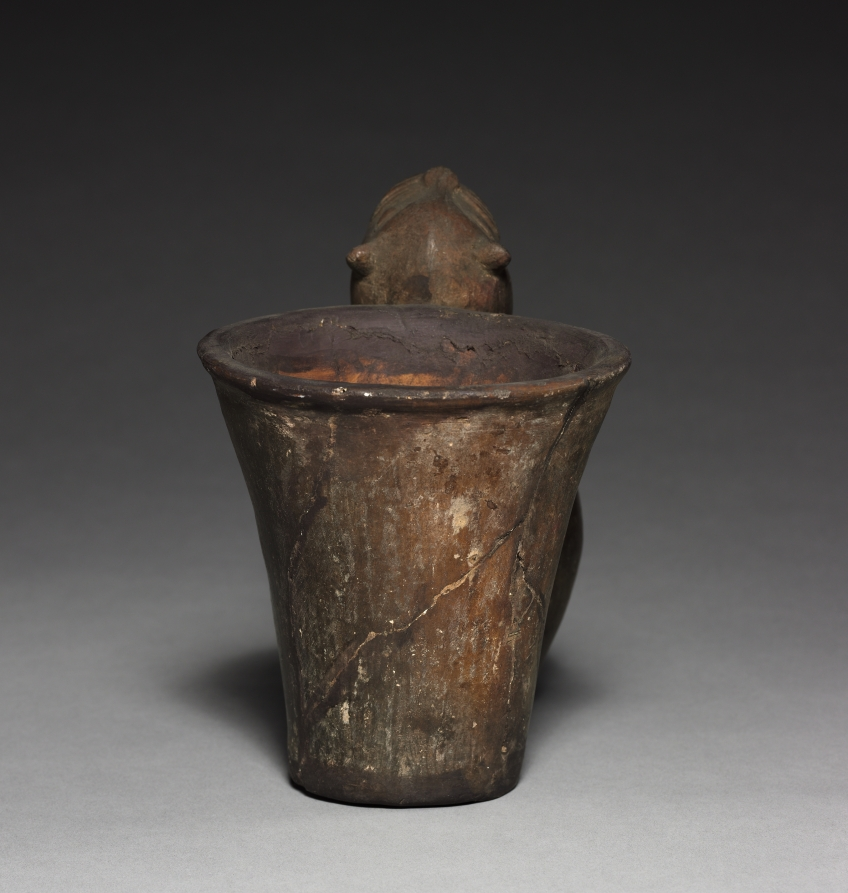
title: Vase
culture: Peru, Huacho Ware?, early 9th Century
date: c. 800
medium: black ware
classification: Ceramic